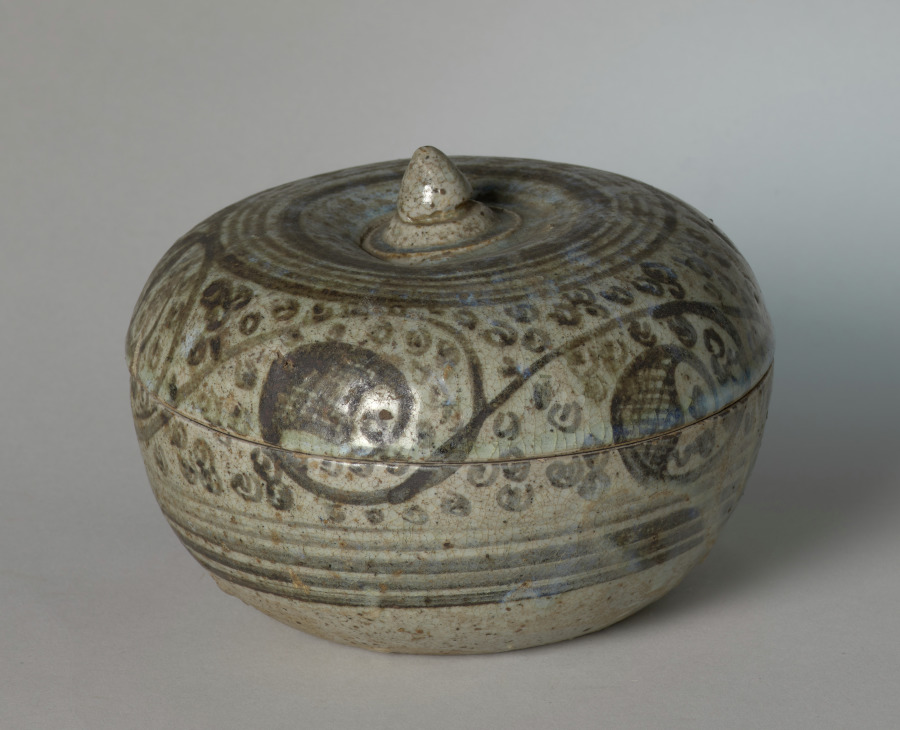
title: Covered Bowl with Painted Decoration with Lid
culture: Siam, Sawankhalok ware, 15th century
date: 1400s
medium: stoneware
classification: Ceramic